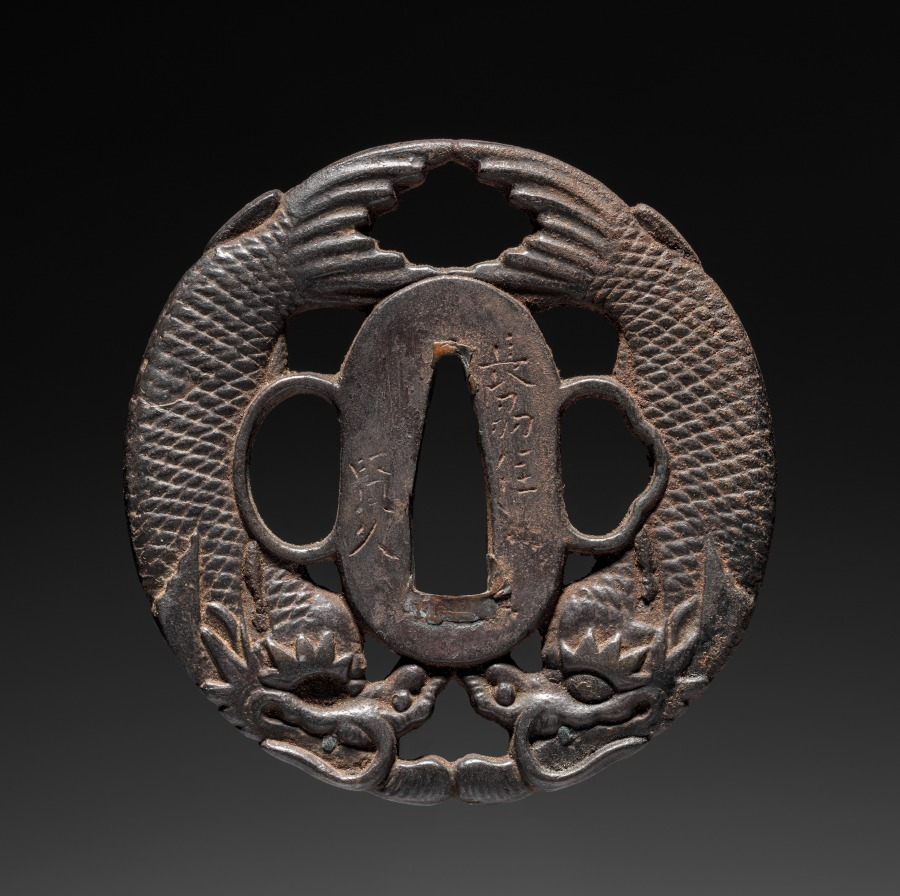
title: Sword Guard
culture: Japan, Edo period (1615–1868)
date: c. 1800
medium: iron (Choshu type)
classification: Arms and Armor